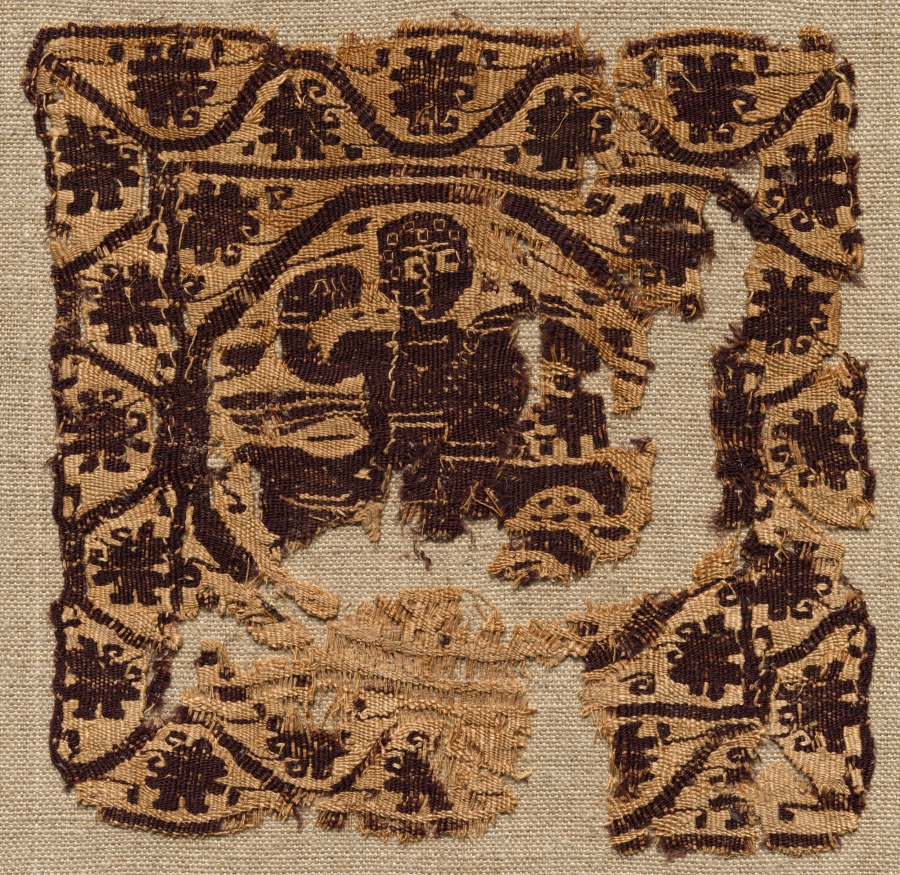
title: Segmentum from a Tunic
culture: Egypt, Byzantine period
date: 500s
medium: tapestry weave (originally inwoven in a tabby ground ?): wool and linen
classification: Textile